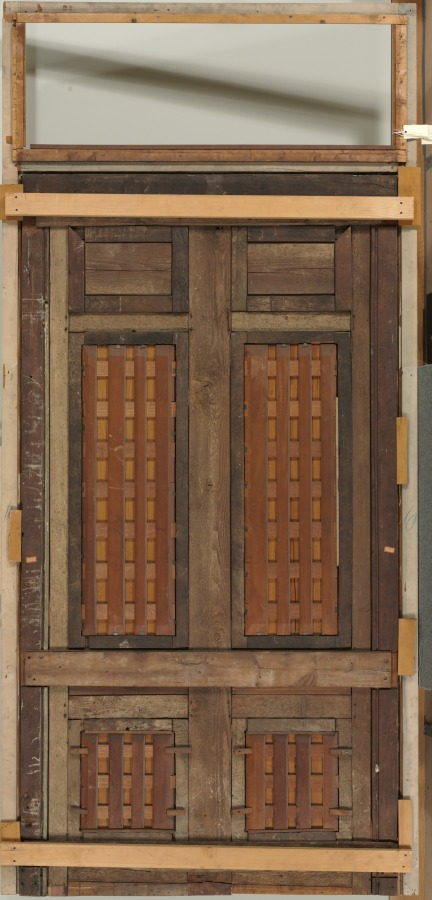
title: Double-Leaf Doors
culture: France, 18th century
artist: Pierre Rousseau (French, 1751–1829)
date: 1790s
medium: oil on wood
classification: Painting